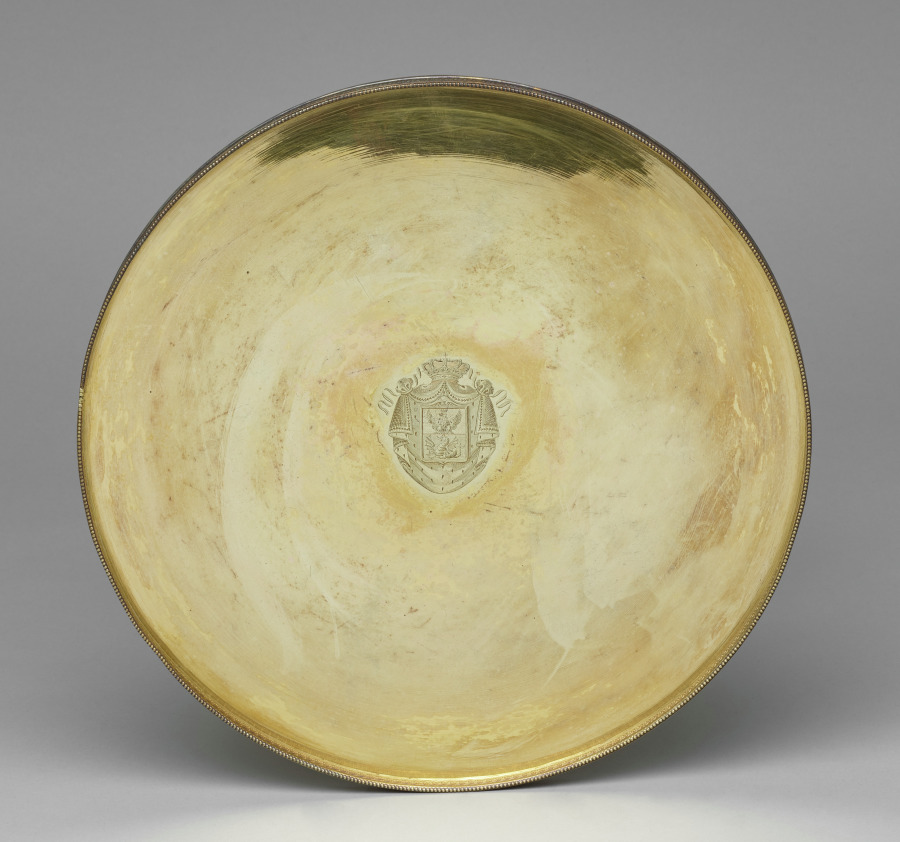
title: Tazza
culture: Italy, Rome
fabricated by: Pietro Paolo Spagna (Italian, 1793–1861)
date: c. 1815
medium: silver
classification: Silver